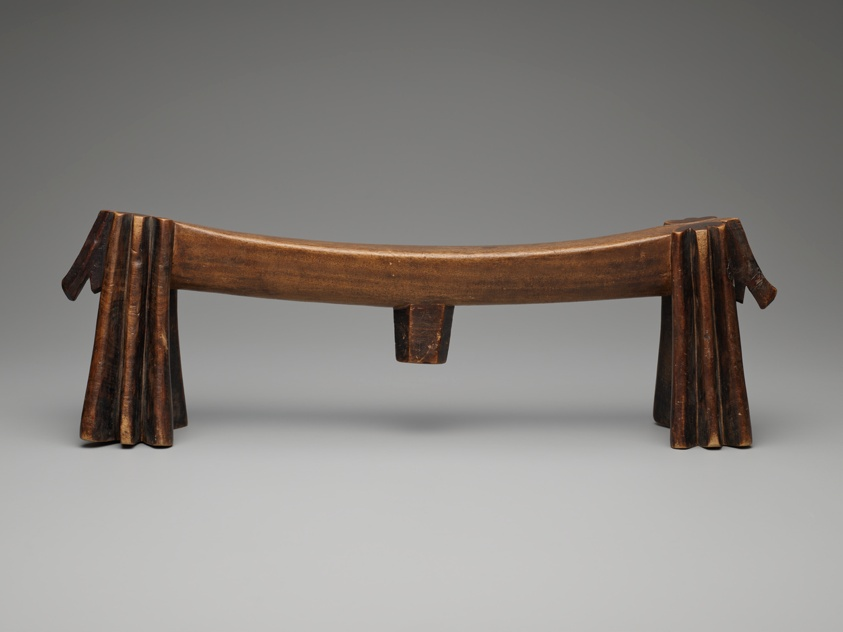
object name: Sculpture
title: Headrest (Isicamelo)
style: swazi (nguni), Eastern and Southern Africa, south african, Arts of Africa, african Art, 19th century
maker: Swazi; Eswatini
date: 19th century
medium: Wood and pokerwork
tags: Headrest